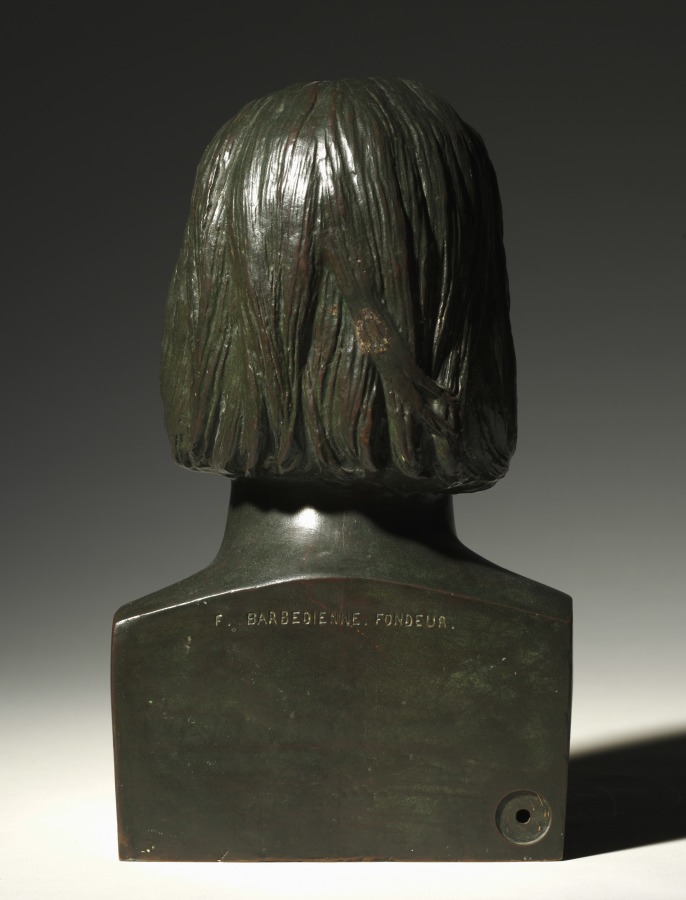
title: Head of Balzac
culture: France, 19th century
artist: Pierre-Jean David d'Angers (French, 1788–1856)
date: 1844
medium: bronze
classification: Sculpture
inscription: inscribed in lower front: "DE BALZAC." The artist's name and date ("DAVID DANGERS/1844") are inscribed on the left side, and the foundry's name ("F. BARBEDIENNE FONDEUR") is inscribed on the back. All inscriptions were made in the mold.